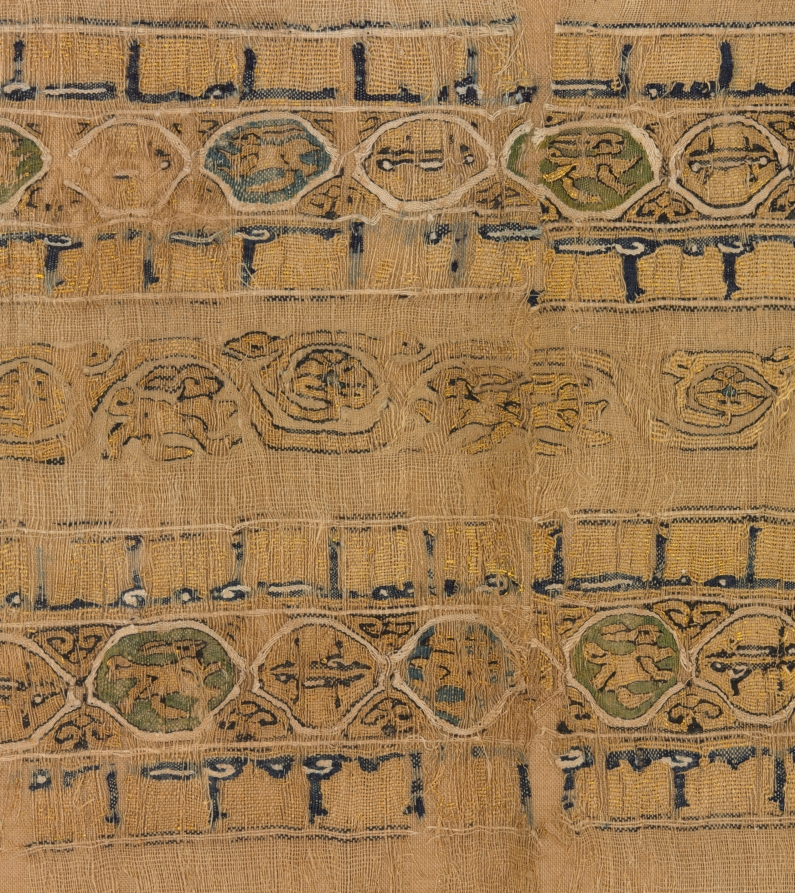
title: Tiraz with gold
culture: Egypt, Fatimid period, reign of Caliph al-Musta‘lī, 1094–1101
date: 1094 – 1101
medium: plain weave with inwoven tapestry weave: linen, silk, and gold filé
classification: Textile